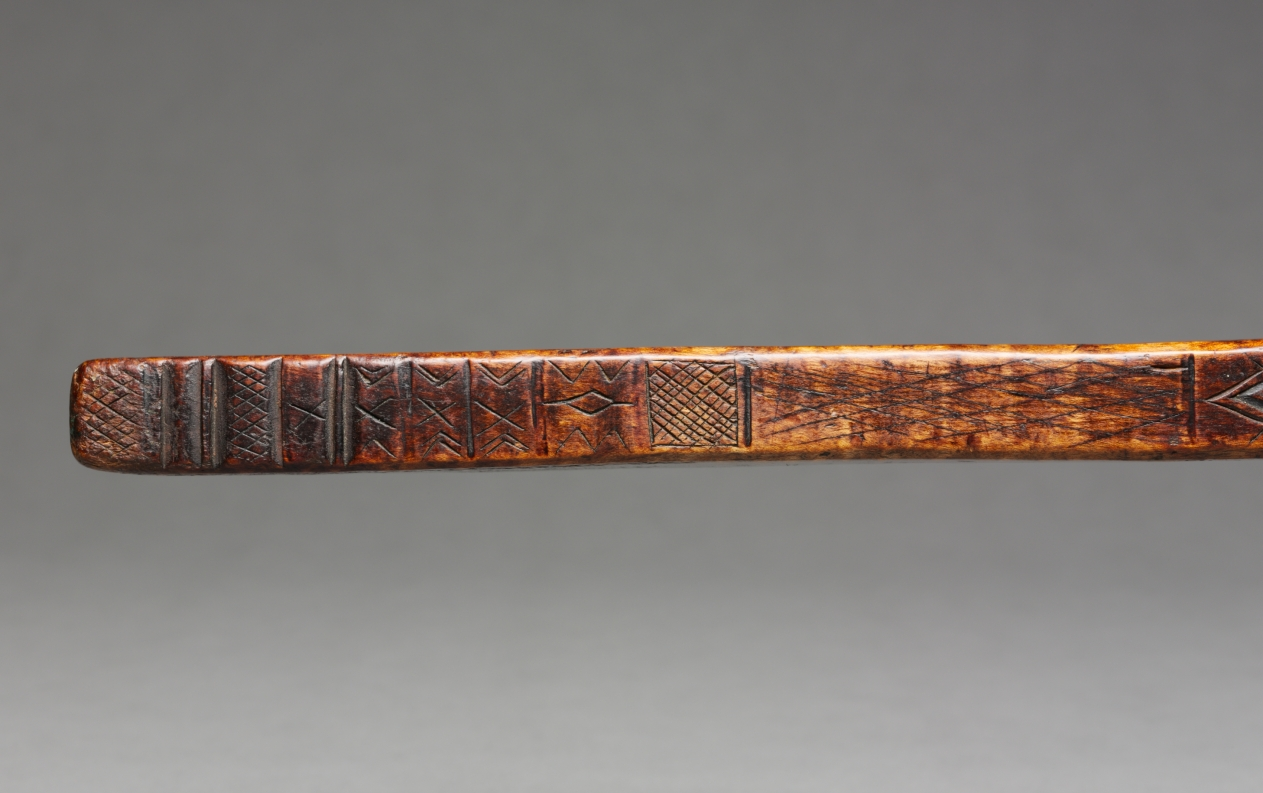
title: Ball-Headed War Club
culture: Native North America, Northeastern Woodlands, Great Lakes, Anishinaabe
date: late 1700s–early 1800s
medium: wood (maple?)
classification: Implements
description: The ball at the striking end of this club is clenched in an abstract, jawlike form that likely refers to a protector animal who endowed the owner with power. Incised on the shaft is a rich record of doodemag (singular, doodem, “totem”)—animals representing other-than-human progenitors from which Anishinaabe peoples trace their descent. (The Anishinaabeg, a group of related Great Lakes nations, include the Odawa, Ojibwe, Potawatomi, and others.) Included is an antlered creature, perhaps a caribou, along with mammals, birds, and powerful spirit beings: the thunderbird, its wings outstretched, and perhaps the long-tailed underwater panther. When this example was made, clubs had become symbols of status and earlier ways of life, having been replaced as favored weapons by metal tomahawks and European firearms. Today, clubs are part of powwow regalia.